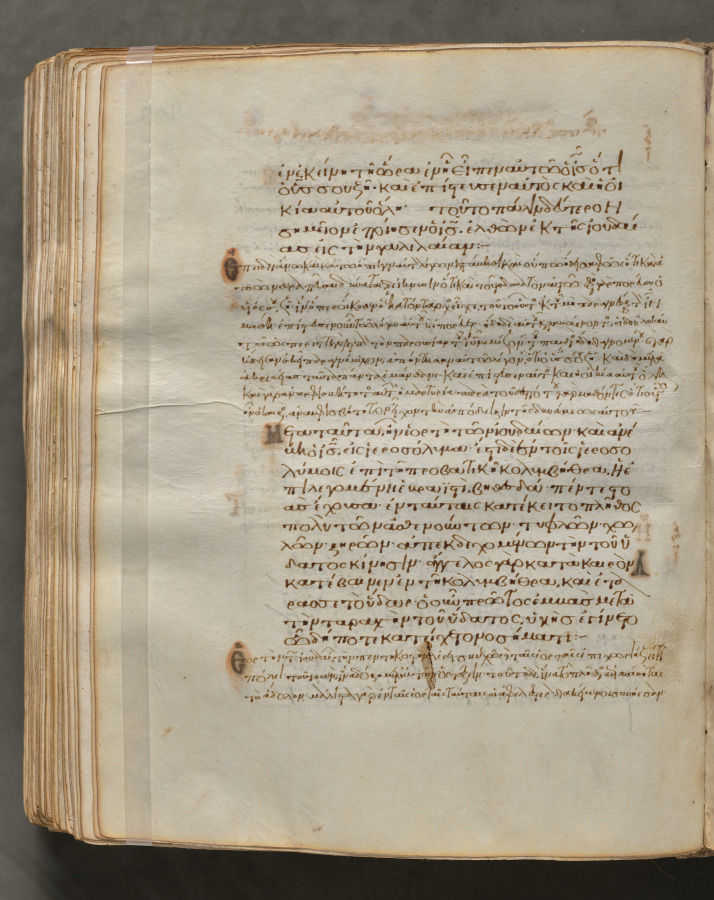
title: Text, folio 342 (verso), from a Gospel Book with Commentaries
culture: Byzantium, Constantinople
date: c. 1000–1100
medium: ink, tempera, and gold on vellum; leather binding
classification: Bound Volume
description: Each of the four gospels in this book opens on a page with brilliantly illuminated borders depicting the author of the text as well as birds—principally peacocks, symbols of the immortality of the soul—and fountains, representing the fountain of life and the salvation of the soul. This volume consists of 428 leaves with texts in Greek. Its level of sophistication suggests that it was probably written and decorated in a monastery in Constantinople.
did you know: Gospel books were carried in procession through Byzantine churches.